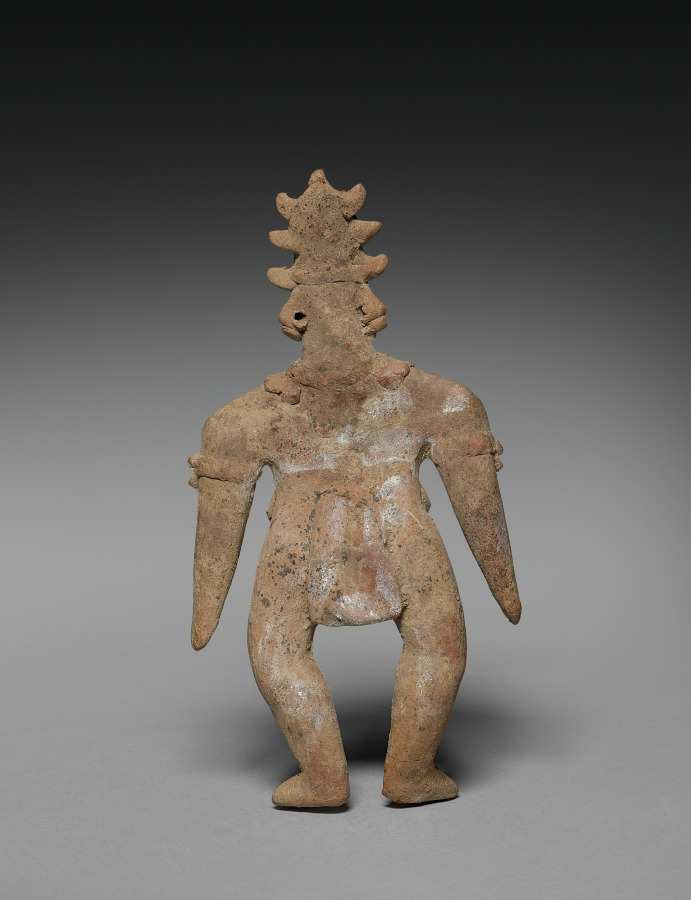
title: Flat Male Figure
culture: Mesoamerica, West Mexico, Colima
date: 200 BCE–300 CE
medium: ceramic, pigment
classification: Sculpture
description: Clay figurines were the earliest and most common art form in Mexico and other countries in the ancient Mesoamerican (Middle American) culture region. Made first by hand and later with molds, most figurines belong to the traditions of commoners, such as farmers, rather than those of elites.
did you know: Clay figurines were the earliest and most common art form in the ancient Mesoamerican culture region.